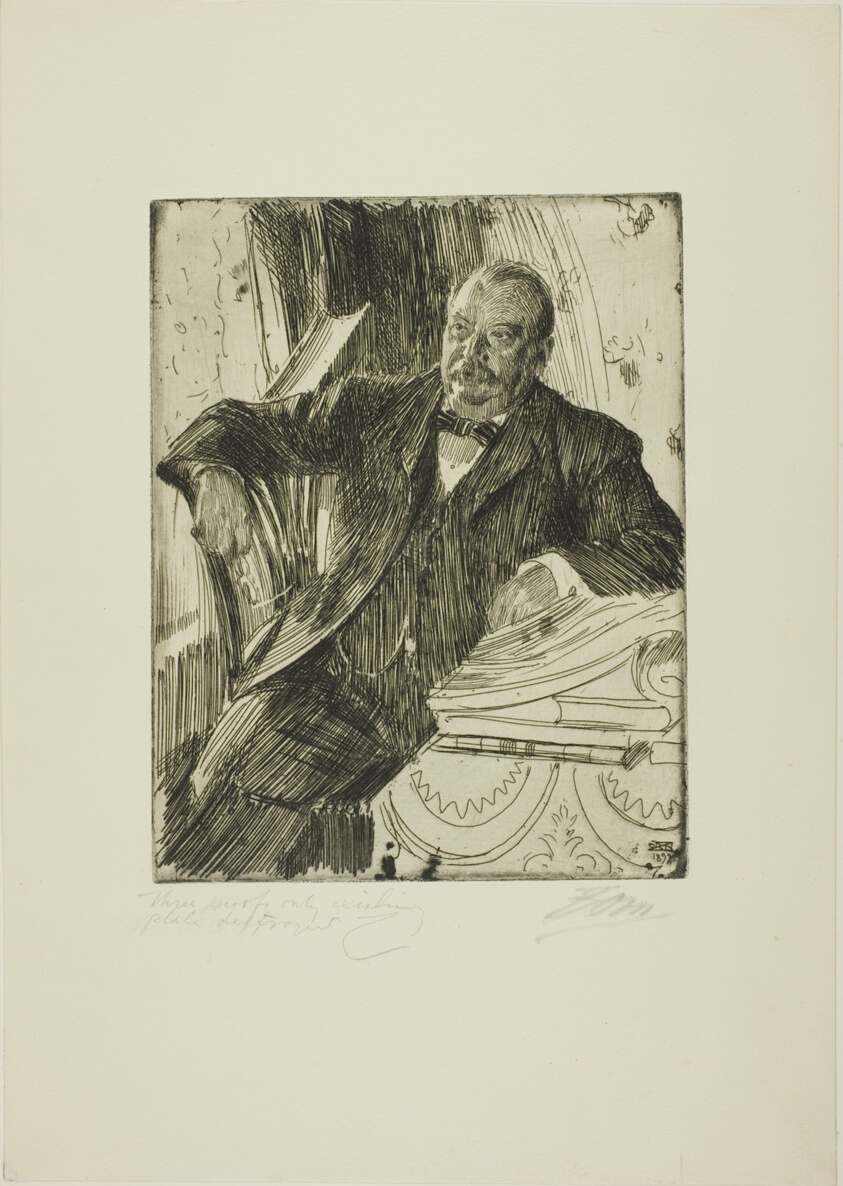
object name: Print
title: Grover Cleveland II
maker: Anders Zorn (Swedish, 1860-1920)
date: 1899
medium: Etching on ivory laid paper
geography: Sweden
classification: etching; print; prints and drawing